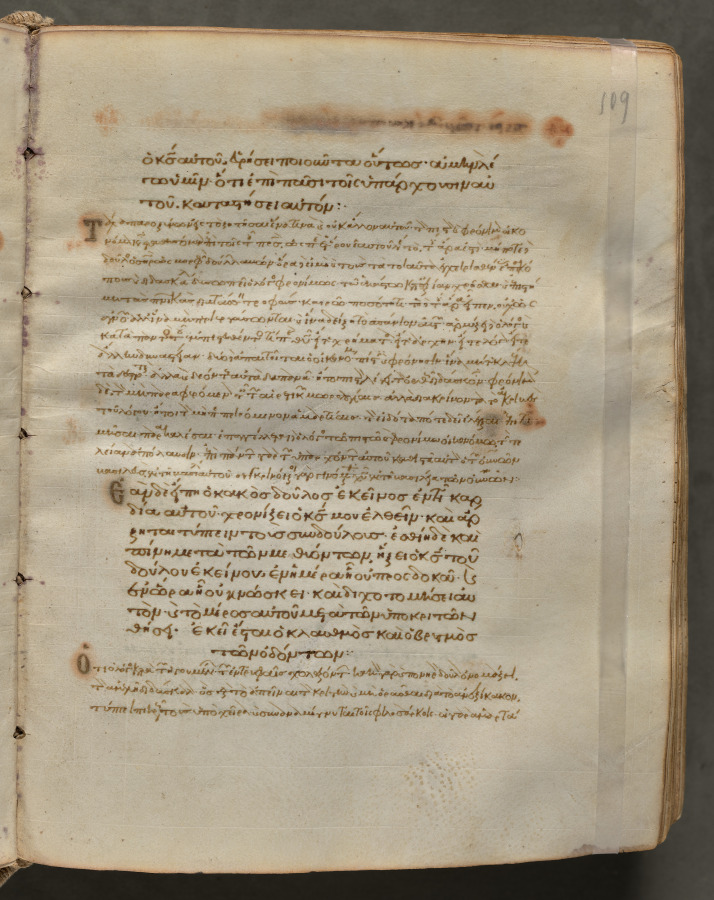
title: Text, folio 109 (recto), from a Gospel Book with Commentaries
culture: Byzantium, Constantinople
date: c. 1000–1100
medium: ink, tempera, and gold on vellum; leather binding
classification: Bound Volume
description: Each of the four gospels in this book opens on a page with brilliantly illuminated borders depicting the author of the text as well as birds-principally peacocks, symbols of the immortality of the soul-and fountains, representing the fountain of life and the salvation of the soul. This volume consists of 428 leaves with texts in Greek. Its level of sophistication suggests that it was probably written and decorated in a monastery in Constantinople.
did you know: Gospel Books were carried in procession through Byzantine churches.